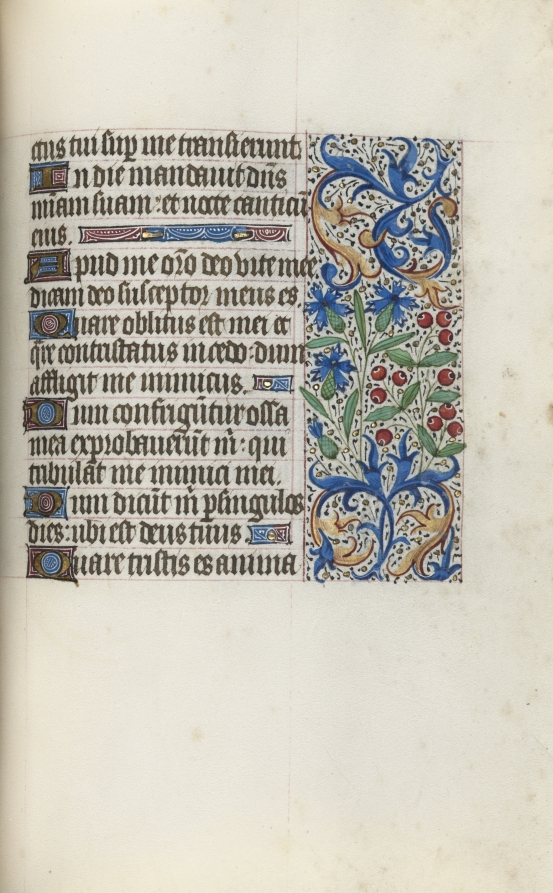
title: Book of Hours (Use of Rouen): fol. 130r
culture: France, Rouen, 15th century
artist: Master of the Geneva Latini (French, active Rouen, 1460–80)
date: c. 1470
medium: ink, tempera, and gold on vellum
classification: Bound Volume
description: In the late 1400s and early 1500s Rouen was an established and important center of book production. The city’s cathedral had a wealthy chapter that spent large sums of money to commission books and to maintain its extensive library. The stationers and booksellers would have likely been concentrated in or near the cathedral precinct. This artist, named after a manuscript now in Geneva, was Rouen’s principal illuminator during the second half of the 1400s.